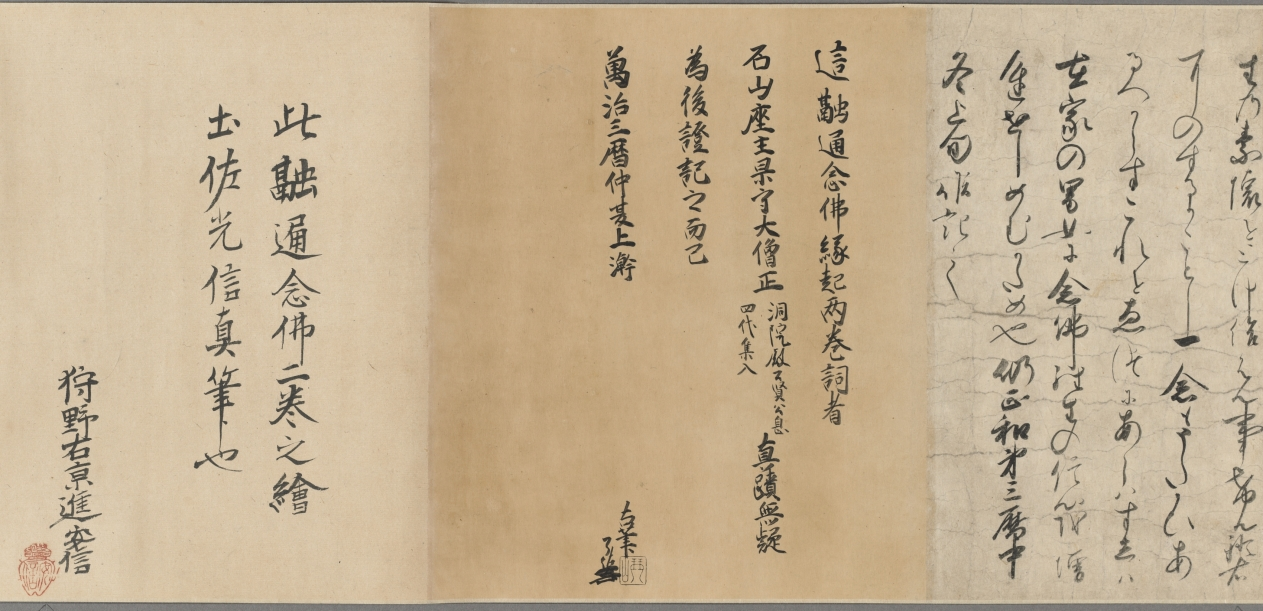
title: The Illustrated Miraculous Origins of the Yūzū Nenbutsu School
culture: Japan, Kamakura period (1185–1333)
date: early 1300s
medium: Handscroll; ink, color, and gold on paper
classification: Painting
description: This painting is the second of a set of two illustrated handscrolls. The first scroll depicts the biography of the Japanese Buddhist monk Ryōnin. This scroll begins with scenes of Ryōnin’s death and relates episodes illustrating the efficacy of following his teachings. Ryōnin asserted the total interconnectedness of all things and the spiritual benefit of chanting the name of the Buddha Amida for one another.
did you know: The other scroll from this two-scroll set belongs to the Art Institute of Chicago.